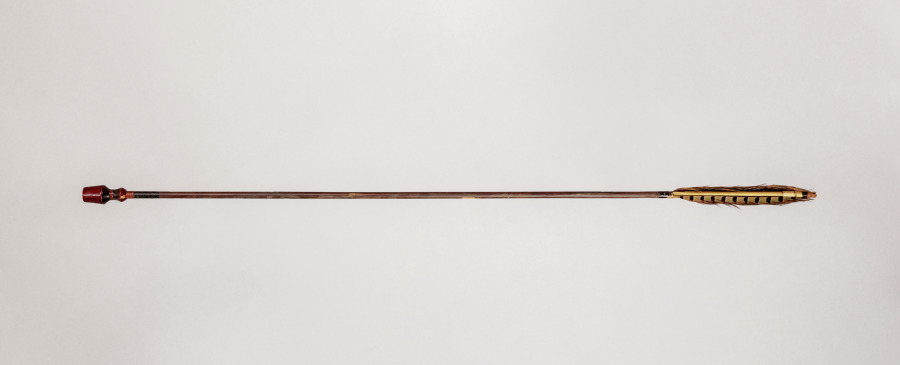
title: Arrow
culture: Japan, Edo period (1615–1868) to Meiji period (1868–1912)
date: 1800s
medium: bamboo shaft tipped with metal point and heeled with feathers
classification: Arms and Armor